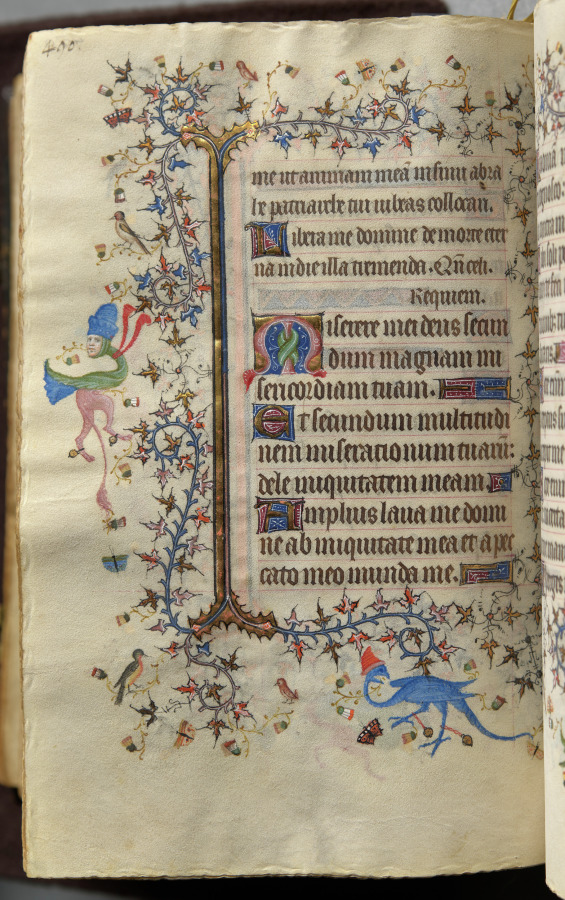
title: Hours of Charles the Noble, King of Navarre (1361-1425): fol. 239v, Text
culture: France, Paris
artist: Master of the Brussels Initials and Associates (French)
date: c. 1405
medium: ink, tempera, and gold on vellum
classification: Bound Volume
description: This precious volume was obviously highly prized by its owner, the French-born King of Navarre, who had his coat of arms painted on no less than twenty folios. Rather than directly commissioning this manuscript from a specific workshop, it seems that Charles the Noble acquired his book of hours -- perhaps ready-made for the luxury market -- while on a trip to Paris in 1404-05. A collaborative effort, six painting styles are evidenced within the pages of this codex, those of two Italians, two Frenchmen, and two Netherlanders. The painter who was responsible for the planning and decoration of the book, and who produced seventeen of the large miniatures, was a Bolognese artist known as the Master of the Brussels Initials. His principal assistant, responsible for most of the borders, was a Florentine who signed his name "Zecho" da Firenze on folio 208 verso.